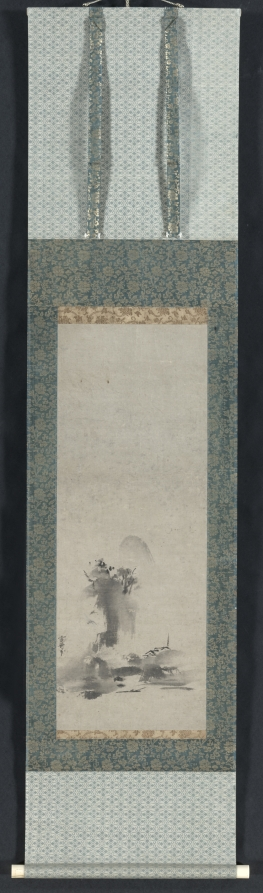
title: Haboku, Splashed Ink Landscape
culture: Japan, Muromachi period (1392–1573)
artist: Sesshū Tōyō (Japanese, 1420–1506)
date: 1400s–early 1500s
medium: hanging scroll; ink on paper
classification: Painting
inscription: signed Sesshu hitsu.